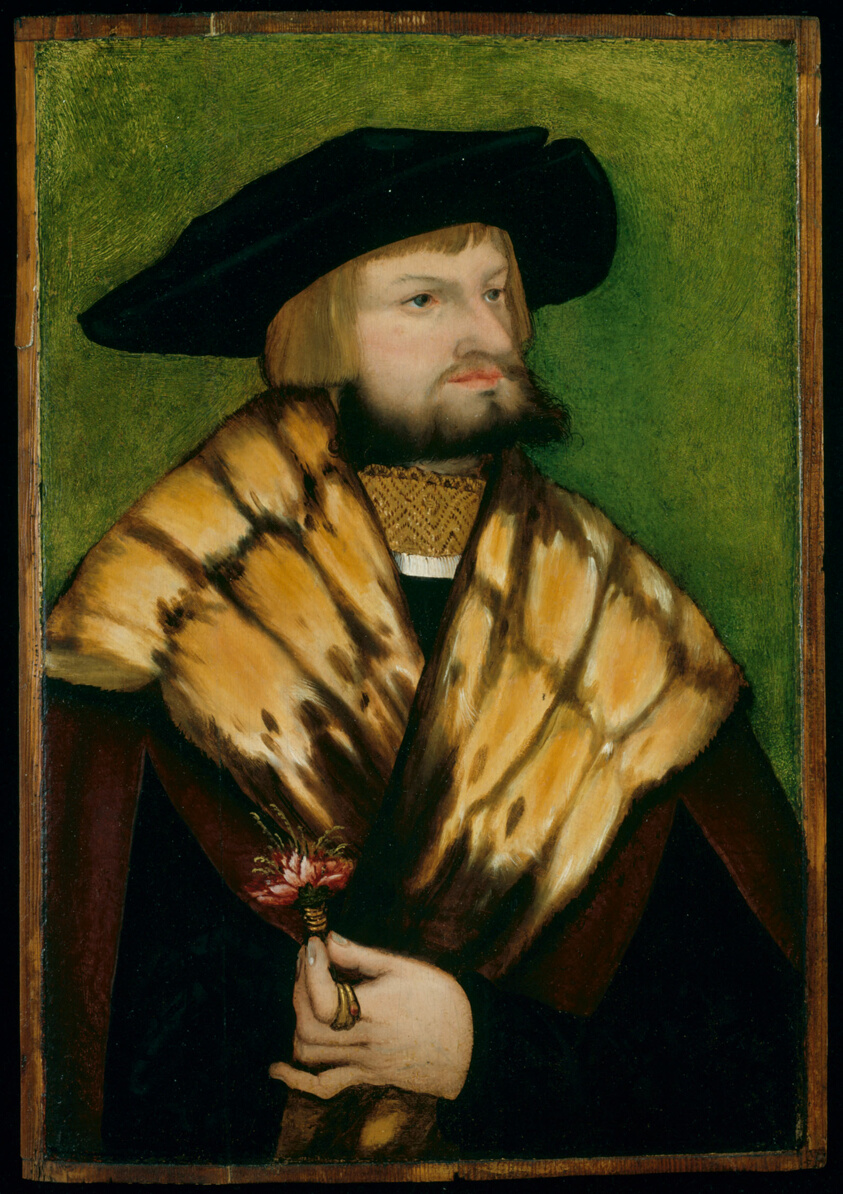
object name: Painting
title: Portrait of Leonhard Fuchs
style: 16th Century, sixteenth century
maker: German; Bavaria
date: 1525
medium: Oil on panel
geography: Germany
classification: oil on panel; german; oil paintings (visual works); paint; portrait; painting; european painting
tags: portraits: male subject, Germany, flowers, green (color), hat, jewelry, luxury, man, portrait, portraits, wealth